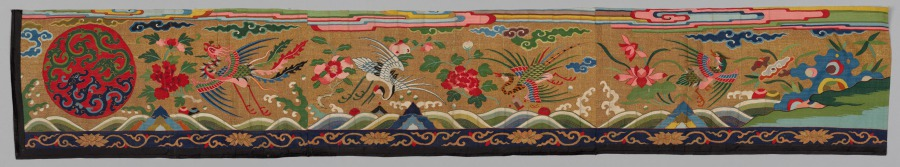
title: Strip of Silk Tapestry (Kesi)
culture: China, Qing dynasty (1644–1911)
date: 1700s–1800s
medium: Silk and gold thread; tapestry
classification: Tapestry